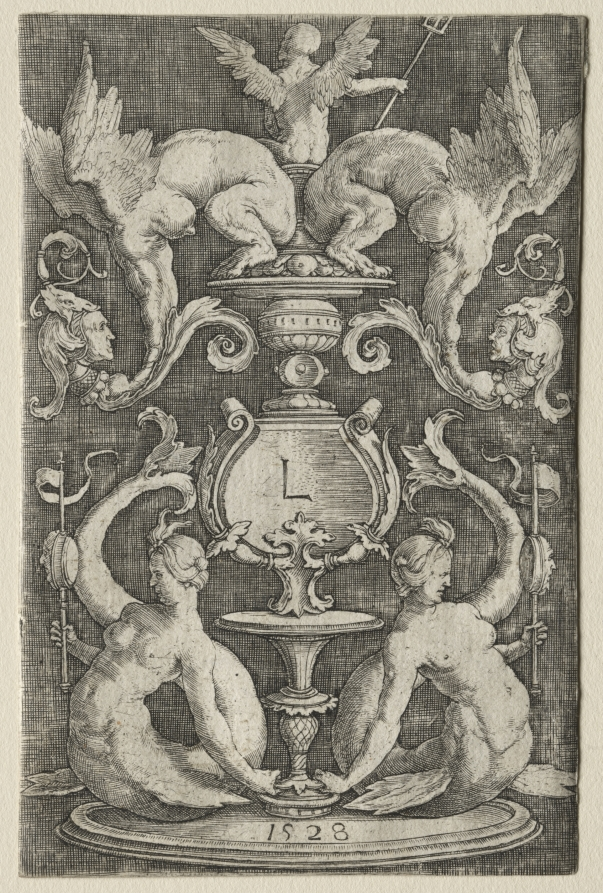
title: Panel of Ornament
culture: Netherlands, 16th century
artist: Lucas van Leyden (Netherlandish, 1494–about 1533)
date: 1528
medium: engraving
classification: Print